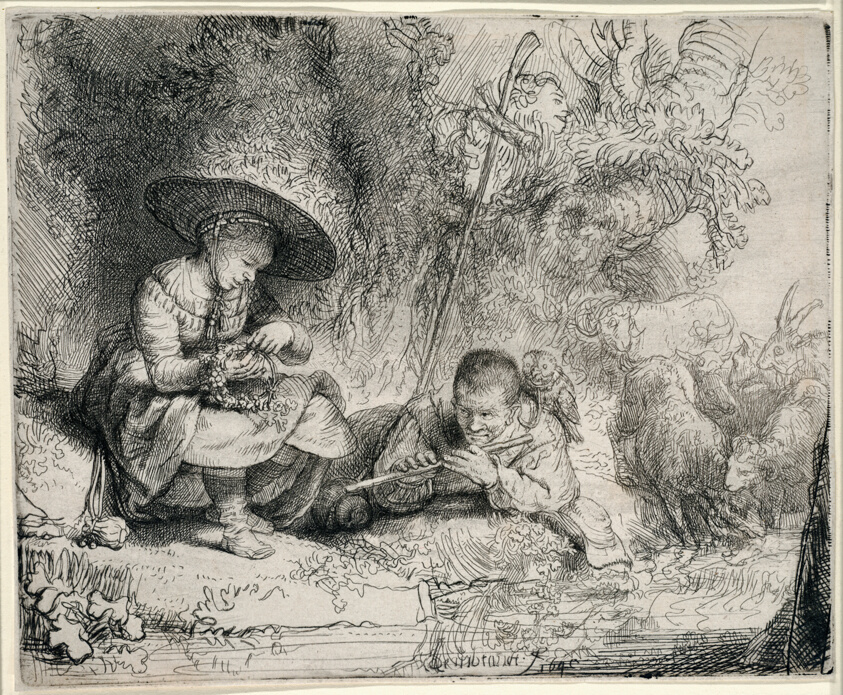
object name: Print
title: The Flute Player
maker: Rembrandt van Rijn (Dutch, 1606-1669)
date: 1642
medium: Etching and drypoint on ivory laid paper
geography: Netherlands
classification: etching; print; prints and drawing; paper; drypoint